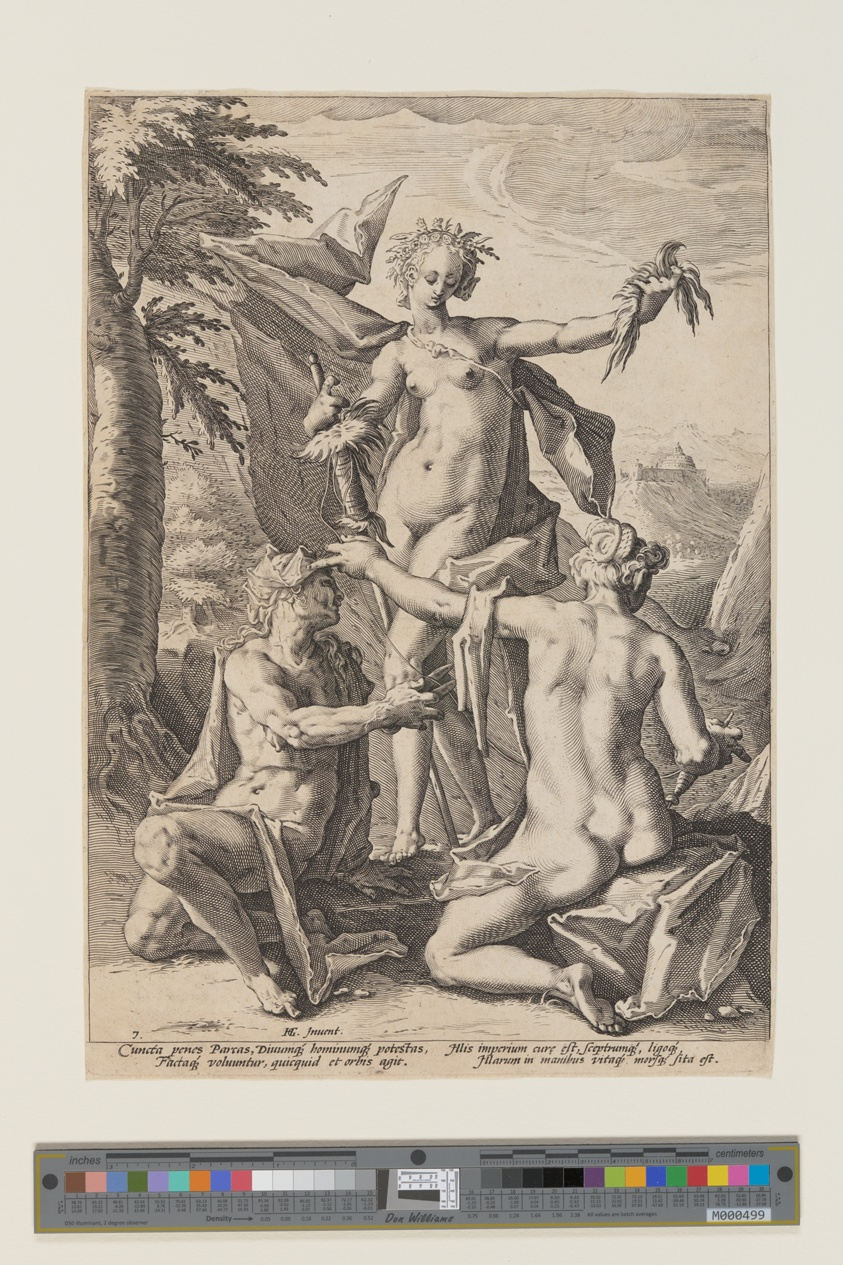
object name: Print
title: The Fates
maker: Jacob Matham (Dutch, 1571–1631); after Hendrick Goltzius (Dutch, 1558–1617)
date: c. 1600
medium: Engraving on ivory laid paper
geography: Netherlands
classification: print; paper; prints and drawing; engraving